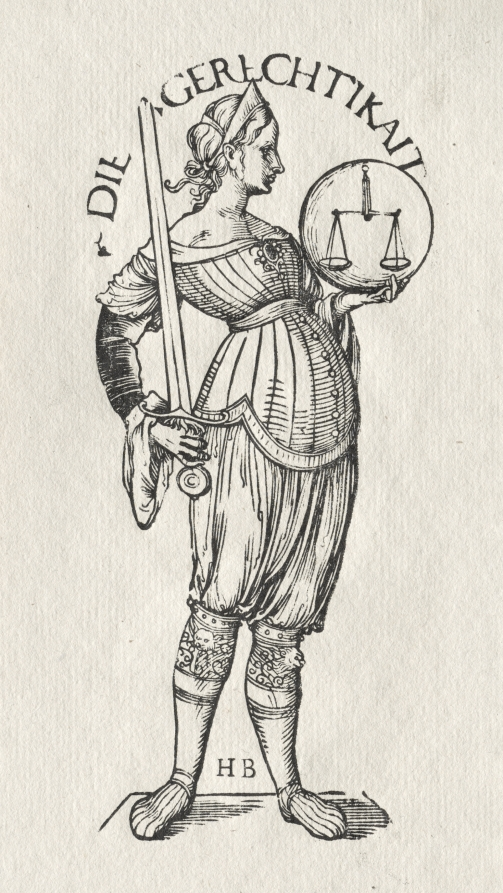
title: The Seven Virtues: Justice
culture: Germany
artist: Hans Burgkmair (German, 1473–1531)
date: 1510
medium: woodcut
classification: Print